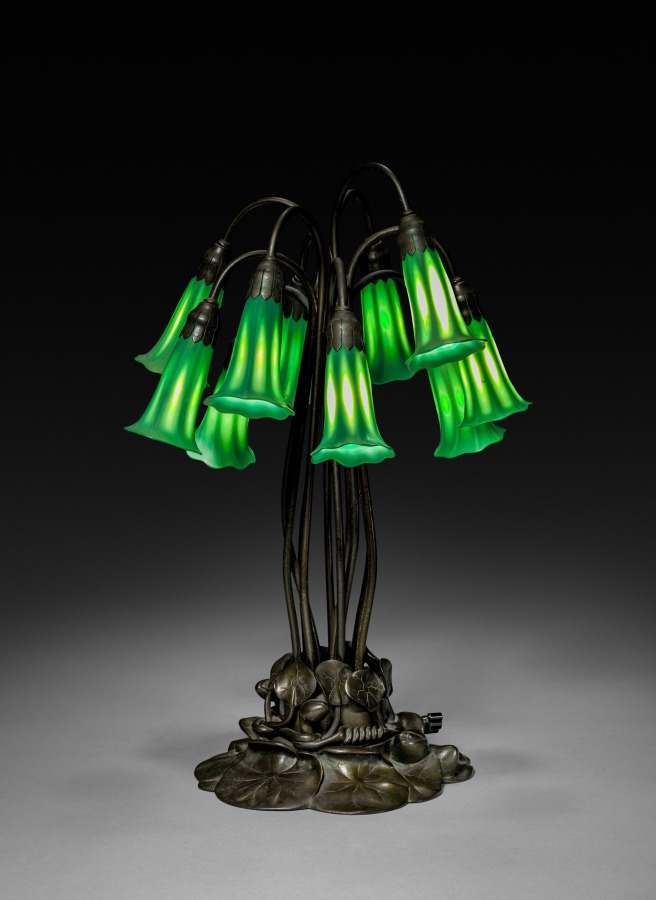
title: Pond Lily Table Lamp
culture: America, New York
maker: Tiffany Studios (United States, New York, 1902–32)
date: c. 1902–10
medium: Favrile glass, bronze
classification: Lamp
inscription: Shades etched: L.C.T.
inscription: stamped on bottom: Tiffany Studios/New York/3(?)8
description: The dawn of the 20th century spurred fresh approaches to design. Louis Comfort Tiffany’s great contribution to this new art movement, termed the Art Nouveau, was not only the shimmering iridescence of his Favrile glass but also the naturalistic compositions of his lamps and windows, which brought him commercial and critical success in both Europe and America. Symbolic themes, such as this lamp's dark blooms of the pond lily in a swampy landscape, became a hallmark of Tiffany's Art Nouveau design. It won a grand prize for Tiffany Studios at the 1902 international exposition in Turin, Italy.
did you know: The dawn of electricity made this lamp possible, transforming a work of sculpture into a useful object.